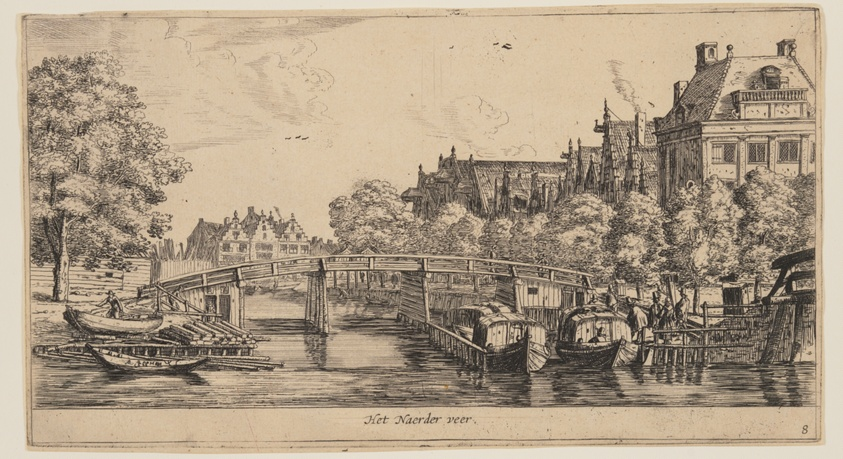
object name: Print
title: Het Naeder veer, from Views of Amsterdam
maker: Reinier Nooms, called Zeeman (Dutch, c. 1623–1664)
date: c. 1660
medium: Etching on ivory laid paper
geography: Netherlands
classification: etching; paper; print; prints and drawing